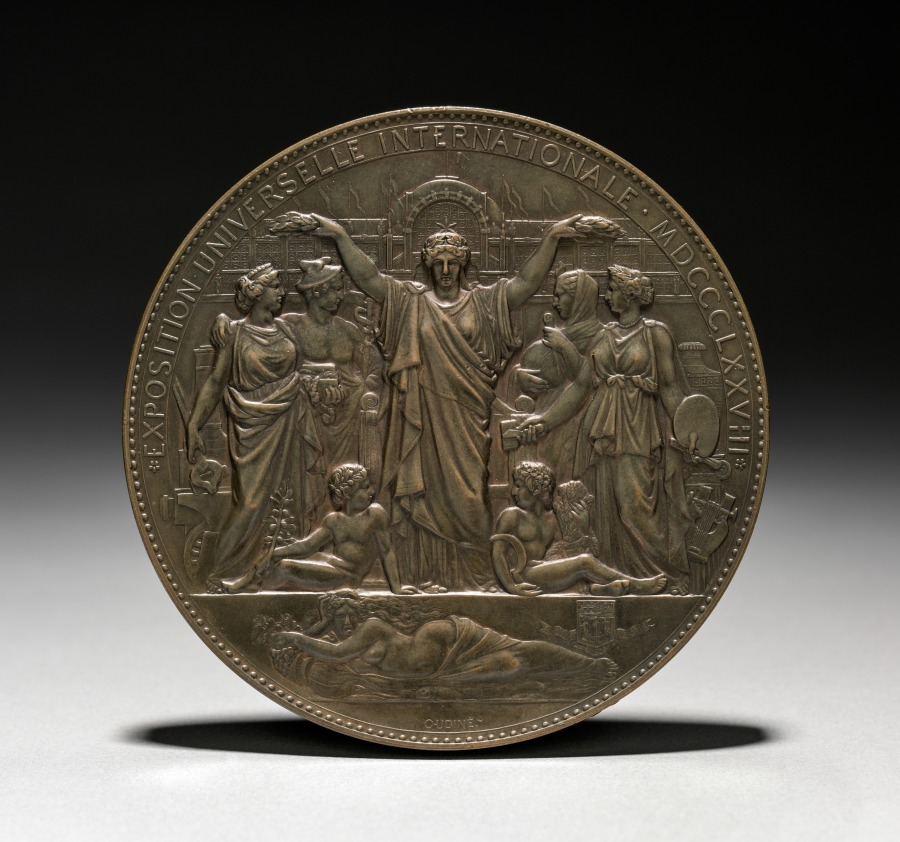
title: Medal (obverse)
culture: France, 19th century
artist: Eugène André Oudiné (French, 1810–1887)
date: 1878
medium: bronze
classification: Metalwork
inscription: "EXPOSITION UNIVERSELLE INTERNATIONAL . MDCCCLXXVIII"; below: "OUDINÉ."